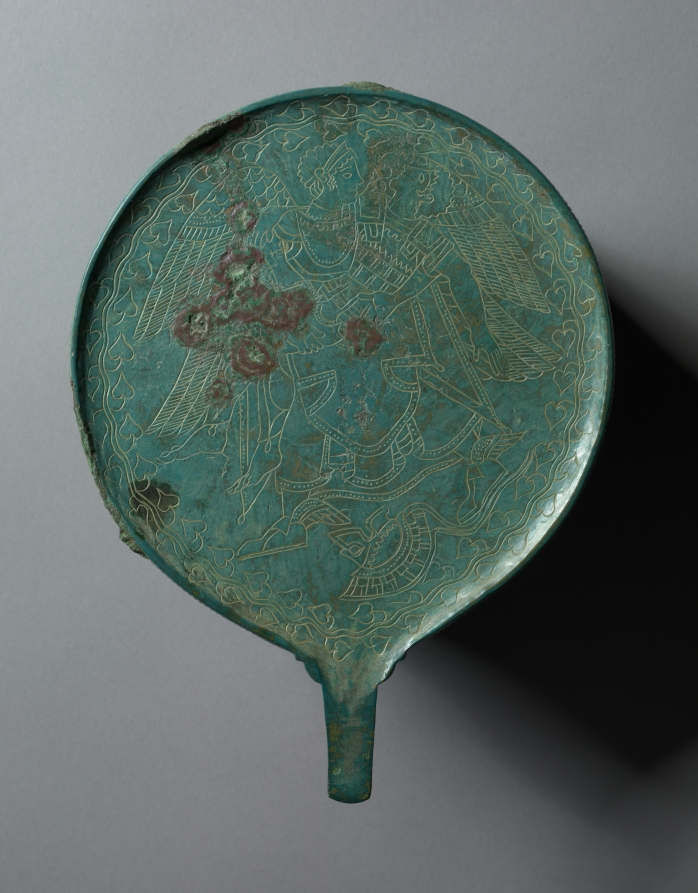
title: Mirror with Engraved Scene: Thesan and Memnun (Eos and Memnon)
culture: Etruscan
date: c. 470–460 BCE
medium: bronze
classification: Metalwork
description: Two figures occupy the reverse side of this nearly circular bronze mirror, neatly enclosed by a continuous ivy-leaf border. Equipped with wings and winged shoes, the dawn goddess Thesan (Eos) carries the body of her son Memnun (Memnon). Slain by Achilles on the battlefield at Troy, he still wears armor and greaves, though his crested helmet has fallen below. The subject occurs on several other Etruscan mirrors and Greek vases of the same time period, though not nearly as frequently as scenes of Eos in pursuit of lovers (including Tithonos, father of Memnon).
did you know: The short tang below the disc of this mirror fit into a larger handle, likely of bone or ivory.